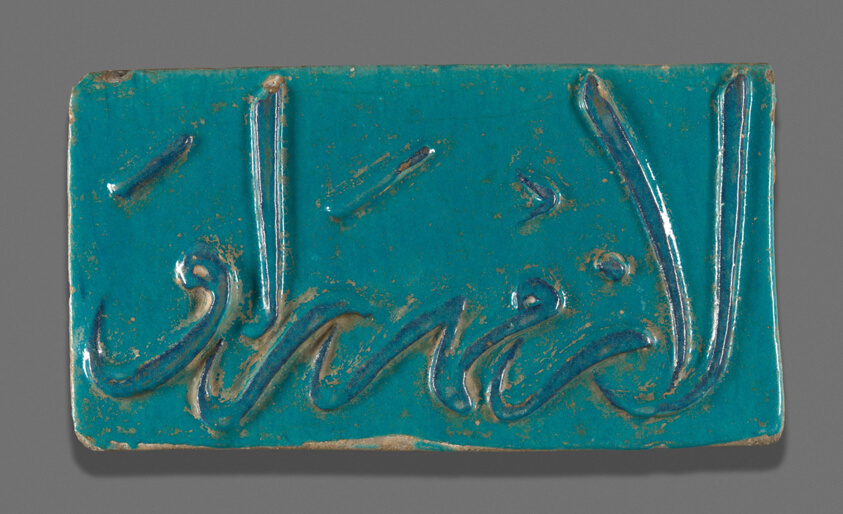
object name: Architectural fragment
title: Tile with Pious Inscription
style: Islamic (culture or style)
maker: Iran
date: Ilkhanid dynasty (1256–1353), Late 13th/early 14th century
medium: Fritware with molded decoration, painted in blue under opaque turquoise glaze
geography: Iran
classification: earthenware; asian art; ceramics; architectural fragment